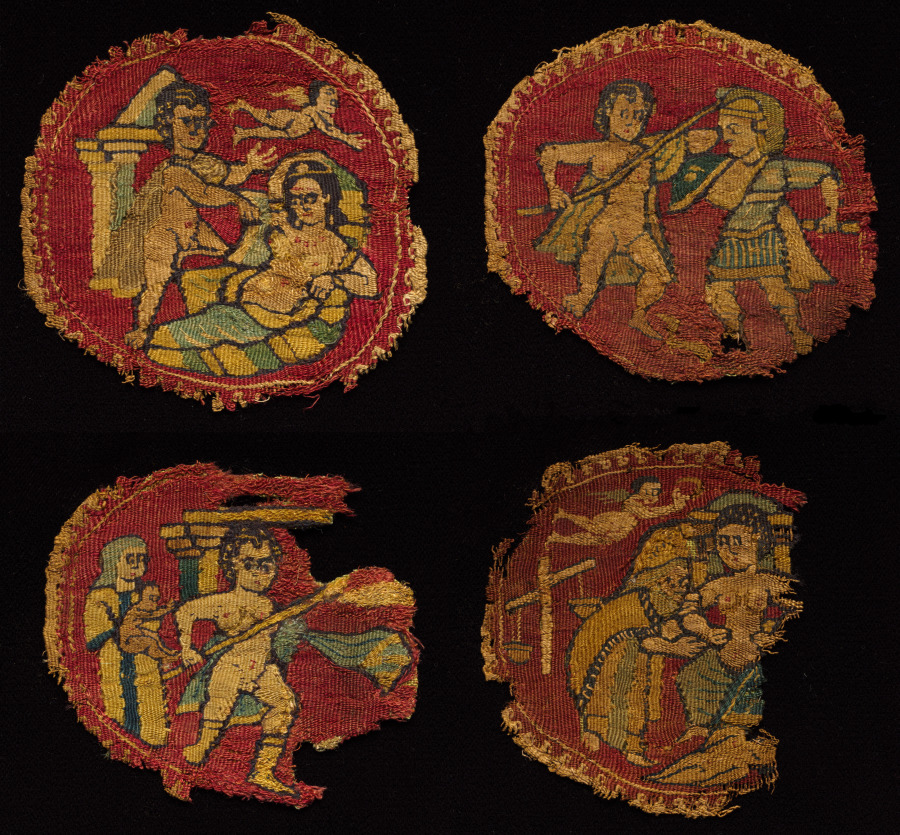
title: Four Segmenta from a Tunic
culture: Egypt, Umayyad period (661–750)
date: 650 – 750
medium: tapestry weave; wool and linen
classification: Textile